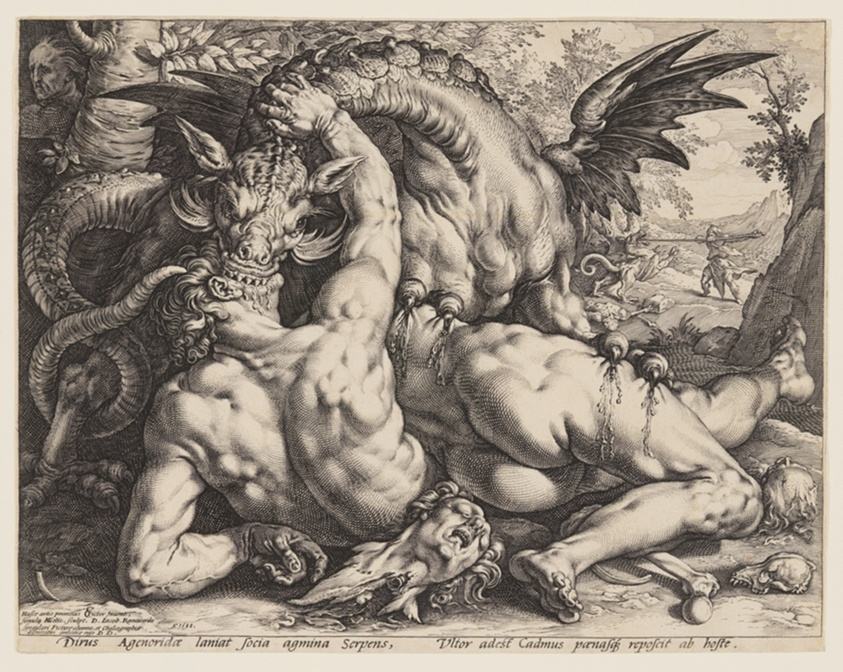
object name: Print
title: The Dragon Devouring the Companions of Cadmus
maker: Hendrick Goltzius (Dutch, 1558–1617); after Cornelis van Haarlem (Dutch, 1562-1638)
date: 1588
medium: Engraving on ivory laid paper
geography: Netherlands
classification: engraving; paper; print; prints and drawing